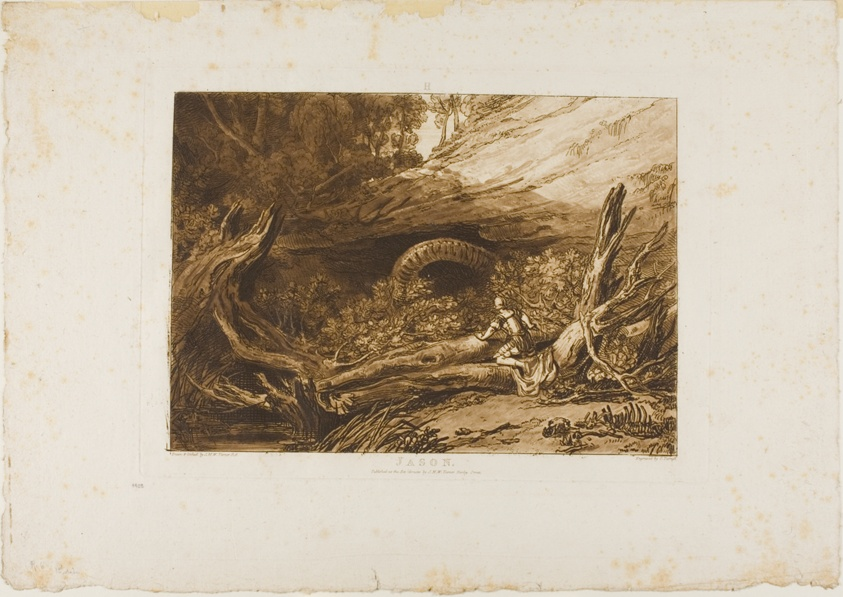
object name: Print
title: Jason, plate 6 from Liber Studiorum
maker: Joseph Mallord William Turner (English, 1775-1851); Engraved by Charles Turner (English, 1773-1857)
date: published 1807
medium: Etching and engraving in brown on ivory wove paper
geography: England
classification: etching; print; prints and drawing